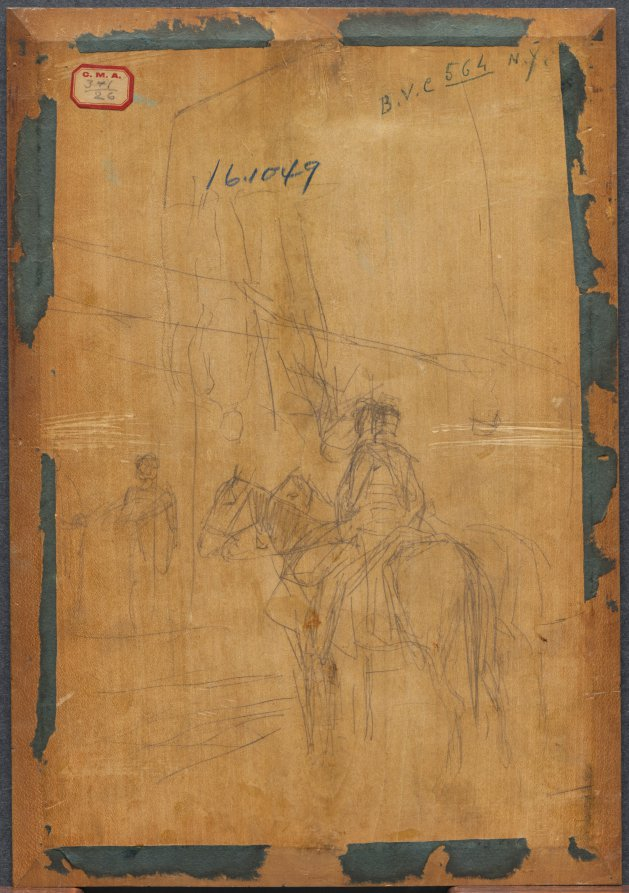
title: Combat for the Colors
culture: France, 19th century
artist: Édouard Detaille (French, 1848–1912)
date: 1874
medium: oil on wood panel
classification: Painting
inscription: Signed in black paint lower left corner: edouard detaille / 1874